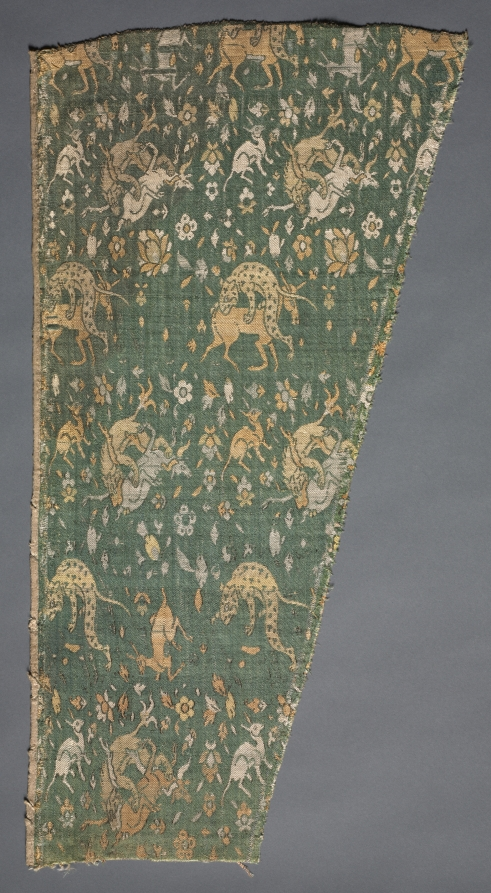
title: Lampas with scenes of wild animals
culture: Iran, Safavid period (1501–1722)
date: 1500s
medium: silk and gold: lampas weave, brocaded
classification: Textile